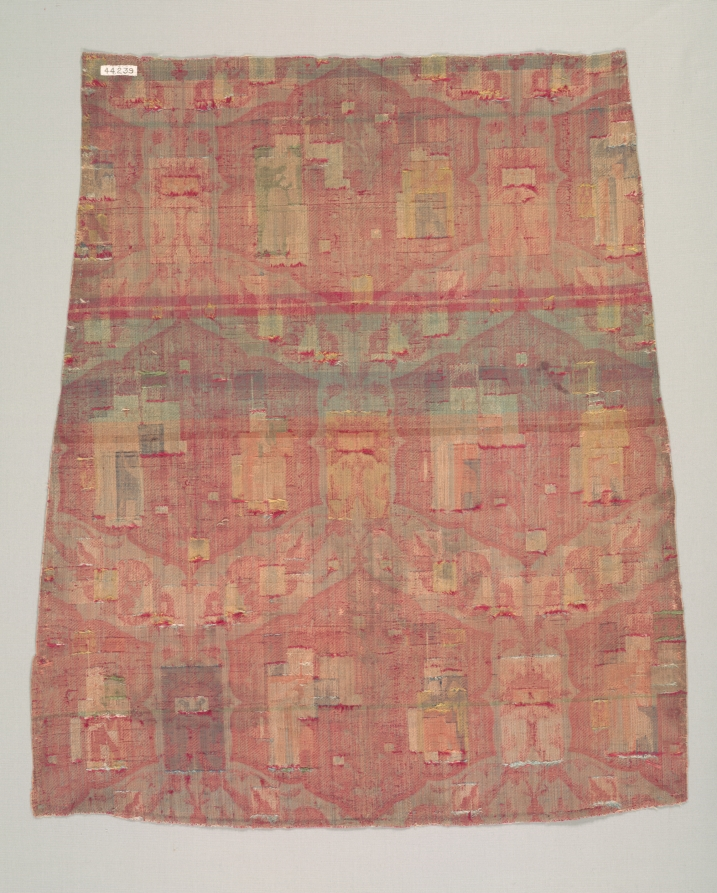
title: Fragment with falconer and attendant in animated lattice, from a robe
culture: Iran, Kashan, Safavid period (1501–1722)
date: mid-1500s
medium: Silk: velvet, brocaded, pile-warp substitution; gilt-metal thread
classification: Velvet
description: This velvet of Iran’s Safavid period (1501–1722) displaying a falconry scene is celebrated for its refined beauty and meticulous draftsmanship. A falconer and attendant flank a blossoming plant on a golden ground of lobed medallions. Animated vines display leaves bearing lion’s masks and dragons coiled around larger leaves on the crimson ground. Instead of two or three colors of velvet, Iranian weavers wove with as many as 14 colors, the most colorful velvets ever woven.